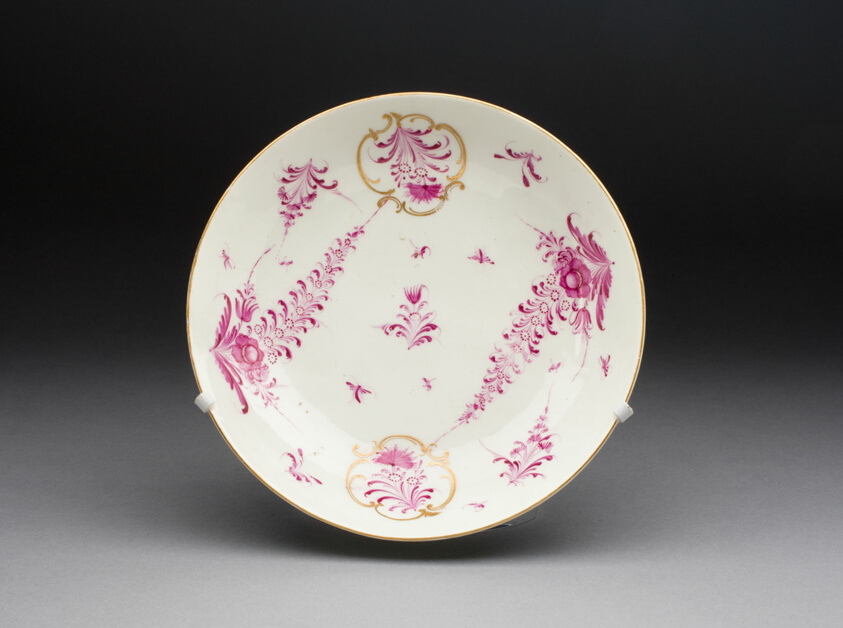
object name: Ceramics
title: Plate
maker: Worcester Porcelain Factory (Warmstry House Period, 1751–1783); Worcester, England, founded 1751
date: c. 1770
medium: Soft-paste porcelain with purple enamel and gilding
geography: Worcester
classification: plate (general, dish); tableware; dish (vessel); porcelain; european decorative arts; ceramics